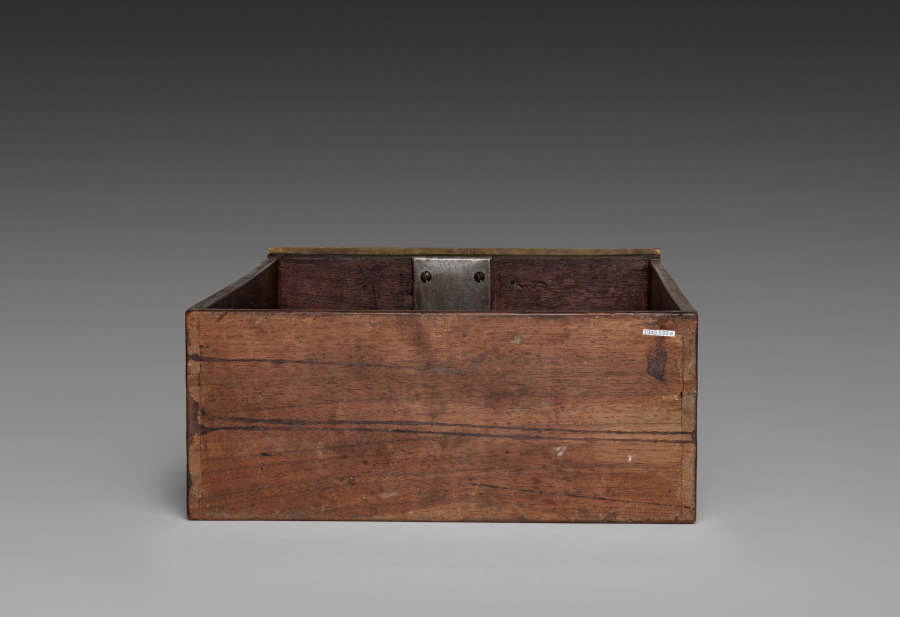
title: Side Drawer for Cabinet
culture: France, late 17th Century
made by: André-Charles Boulle (French, 1642–1732)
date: c. 1690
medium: ebony, marquetry in metal and tortoise shell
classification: Furniture and woodwork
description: Appointed cabinetmaker to King Louis XIV in 1672, André-Charles Boulle became a master of furniture making in France during the late 1600s until his death in 1732. Known primarily for his use of marquetry, in which metal patterns are inlaid into tortoiseshell then applied within the veneered surface of the furniture, Boulle established a level of quality and craftsmanship few others could achieve. As a result, his work found favor at the royal court and among other aristocrats and diplomats eager to impress the king. The inclusion of a medallion depicting Louis XIV within the bronze decoration of this chest would have identified the owner with the royal court. Often exhibiting stout architectural proportions with elegant groups of inlaid motifs such as the parrot on the central panel of this chest, Boulle’s designs are an example of the intellectual fashion for contrasting ideas, materials, and motifs.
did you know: Originally designed to sit atop an elaborate tall stand, this chest was likely altered in the late 1700s to reduce its scale and height.